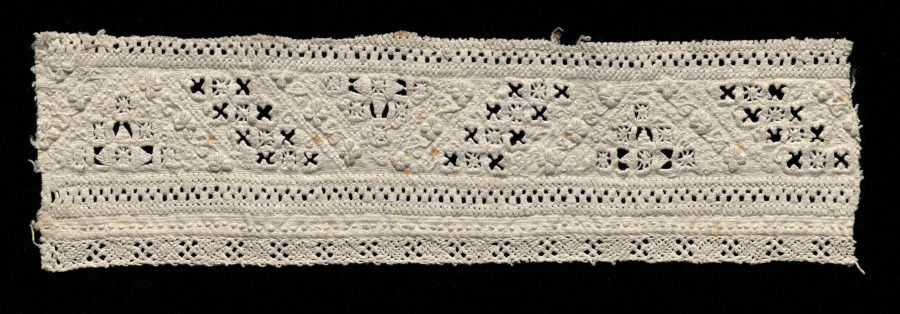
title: Lace fragment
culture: Italy, Venice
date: 1500s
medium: Linen: needle lace (cutwork, drawnwork, reticella) inserts, bobbin lace; punto riccio embroidery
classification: Lace